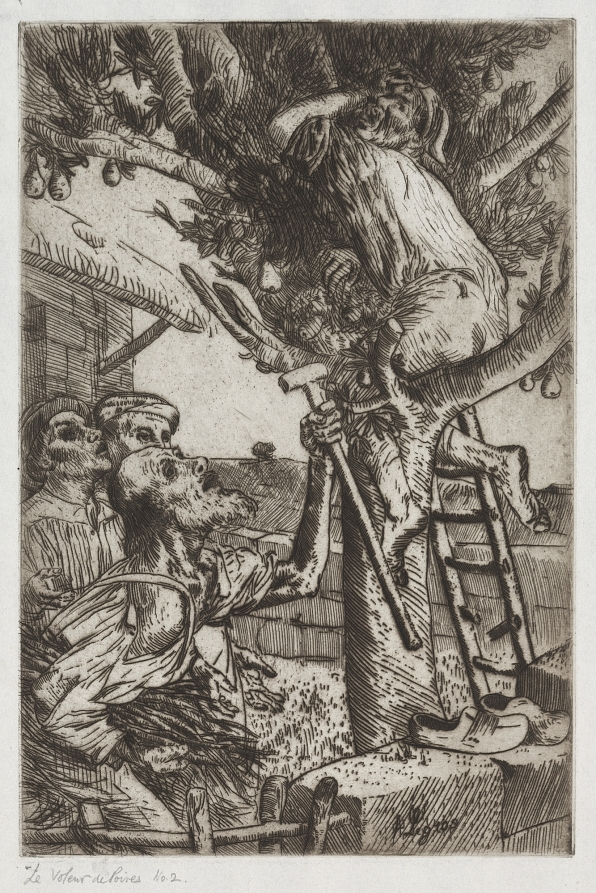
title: The Pear Thief, No. 1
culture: France, 19th century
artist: Alphonse Legros (French, 1837–1911)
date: c. 1890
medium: etching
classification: Print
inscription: lower right, in graphite: Le Voleur de Poires No. 2